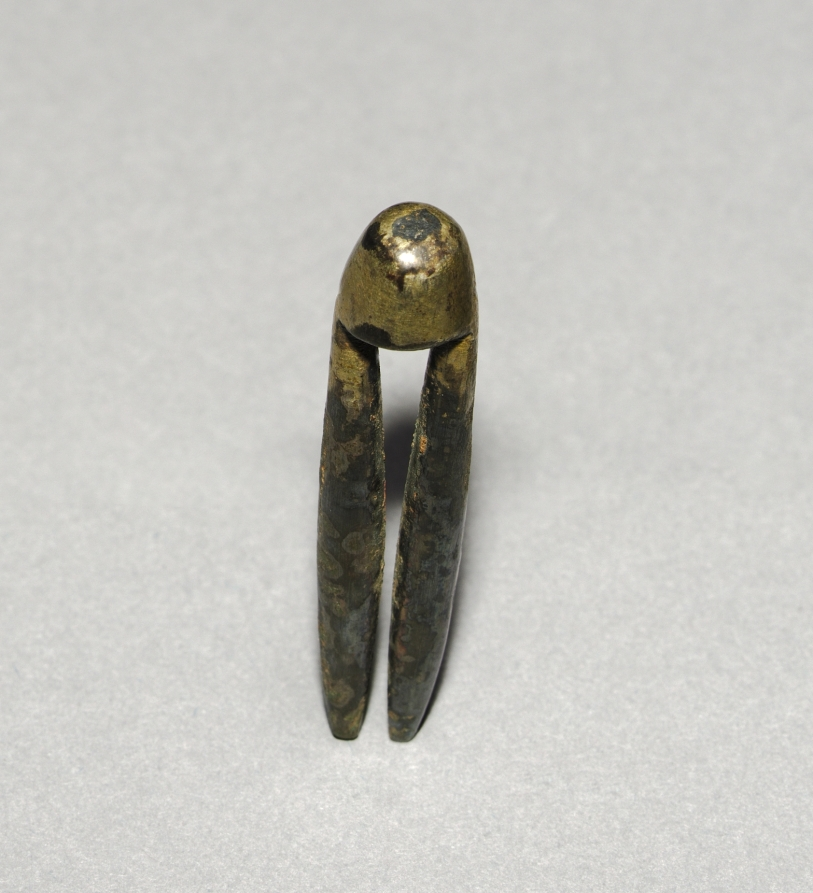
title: Topknot Pin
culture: Korea, Goryeo dynasty (918–1392)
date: 918–1392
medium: silver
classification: Metalwork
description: Metallurgy advanced remarkably in the Goryeo period (918-1392), explaining why a large quantity of sophisticated metal artifacts were used not only as daily accessories but also as burial goods. Men put their hair in a knot at the top of their heads. To keep their long hair from falling, a bronze pin such as this one was used.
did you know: This bronze hairpin was for a man to fix his topknot.